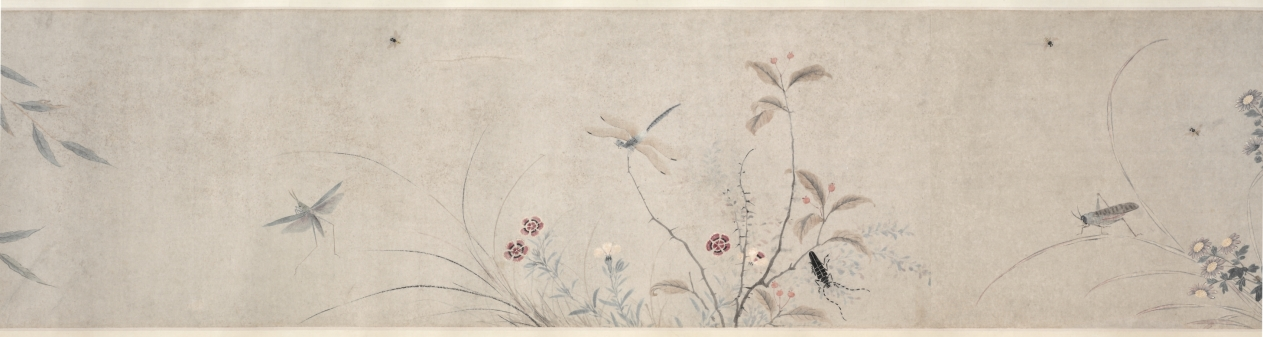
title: Insects and Flowers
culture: China, Qing dynasty (1644-1911) or Republican period (1912-49)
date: c. 1900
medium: Handscroll, ink and color on paper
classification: Painting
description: More than 26 feet long, this scroll presents insects, reptiles, and plants in delicate brushwork and pale colors, referring in style to earlier Southern Song dynasty (1127–1279) bird-and-flower paintings. Upon closer inspection, ants dismember a butterfly and reptiles wait to ambush their prey. An inscription at the end of the painting gives us an idea of its meaning: Attributed to the Qing dynasty scholar Zhang Xigeng (張錫庚, 1801–1861), the inscriber relates the work to an earlier painting by Qian Xuan (錢選, c. 1235–before 1307) and further suggests that the painting may allude to the relentlessness of natural selection. By drawing a parallel to tumultuous episodes in Chinese history, the writer might even hint at the domestic rebellions and the aggression of Western powers against China in his lifetime, particularly the Opium Wars (1839–60).